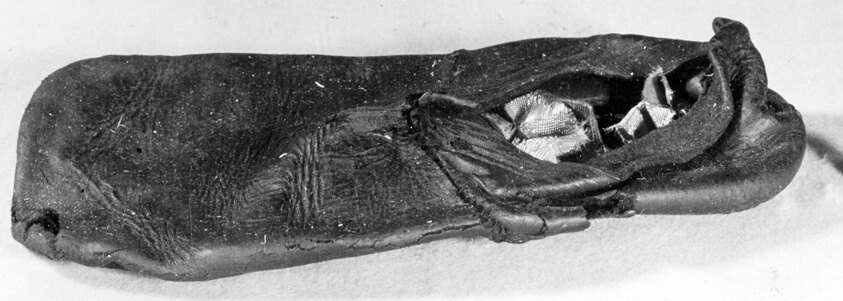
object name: Textile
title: Shoe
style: elizabethan, tudor, european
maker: England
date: 16th century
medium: Leather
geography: England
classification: textile; costume accessory - shoe; shoes - misc; costume; dress (garment); clothing